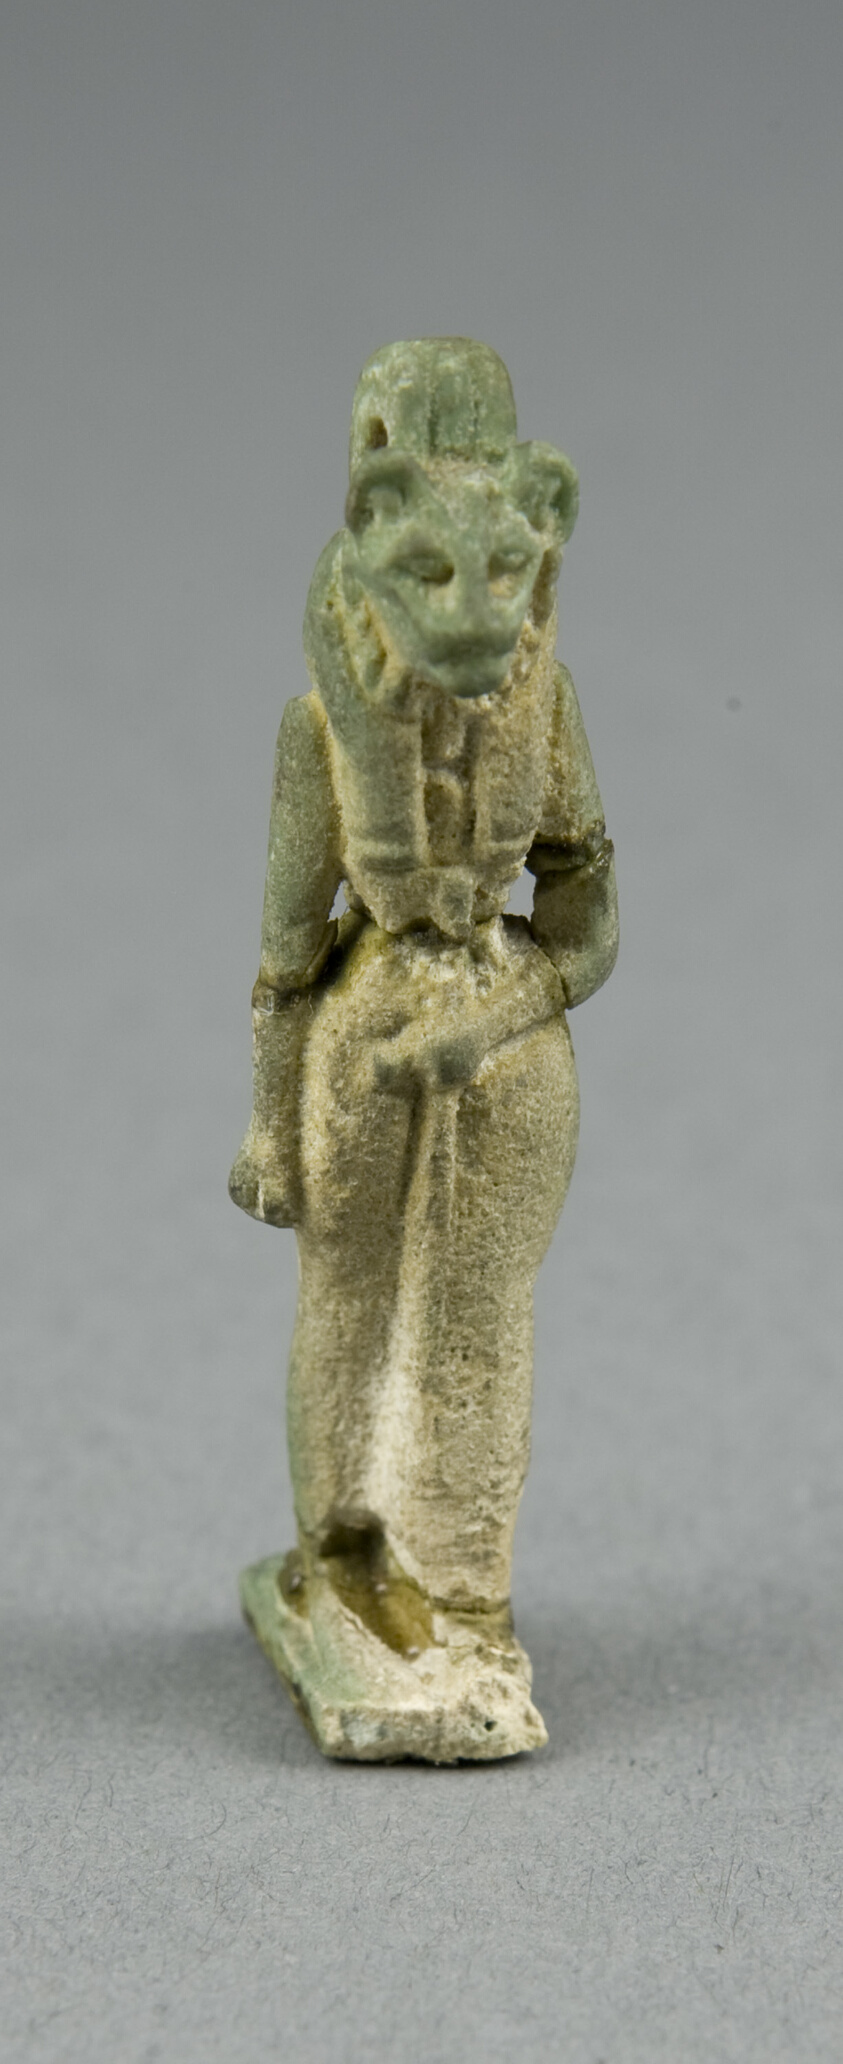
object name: Costume and Accessories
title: Amulet of the Goddess Bastet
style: third intermediate period, egyptian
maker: Egyptian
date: Third Intermediate Period, Dynasty 21–25 (1070–656 BCE)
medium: Faience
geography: Egypt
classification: amulet; jewelry; ceramics; ancient art; costume; faïence (composite material)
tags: goddesses, animals, cats